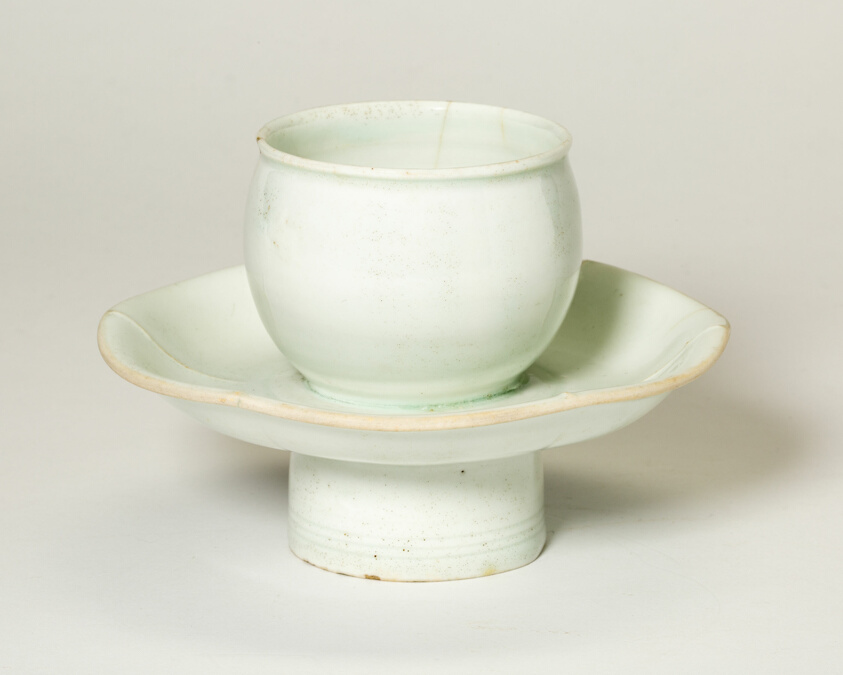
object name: Vessel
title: Cupstand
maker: China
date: Northern Song dynasty (960–1127), 12th century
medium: Qingbai ware; porcelain with underglaze incised decoration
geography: China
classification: ceramics; asian art; vessel